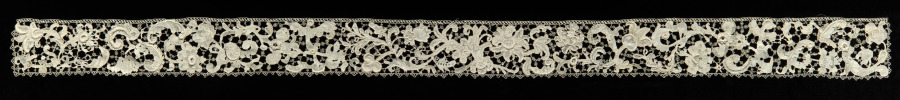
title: Lace Flounce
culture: Italy, Venice, 1600s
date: 1600s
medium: Needle lace (Venetian Raised Point) with Rosaline brides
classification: Lace